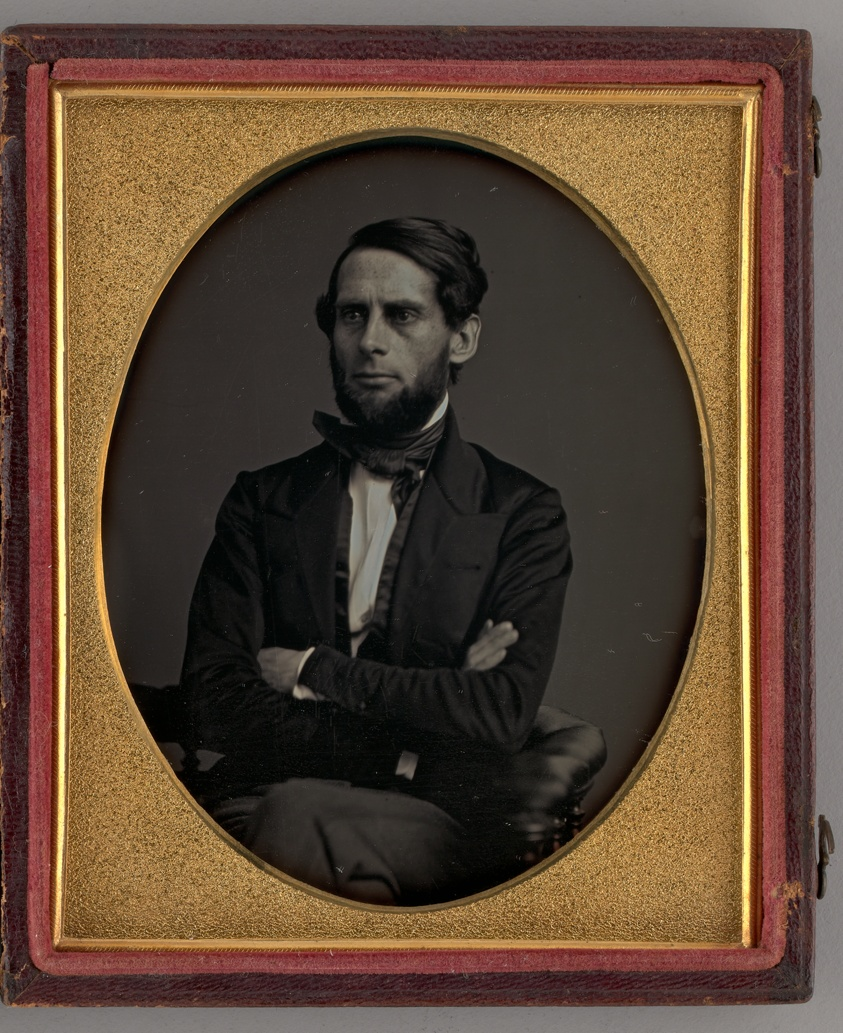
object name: Photograph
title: Untitled (Portrait of Seated Man with his Arms Crossed)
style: 19th century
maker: Unknown maker; American, 19th century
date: 1848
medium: Daguerreotype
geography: United States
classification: portrait; photograph; photographic process; photography; portrait; daguerreotype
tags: lundberg collection, portraits, portraits: male subject, Male, people, portrait